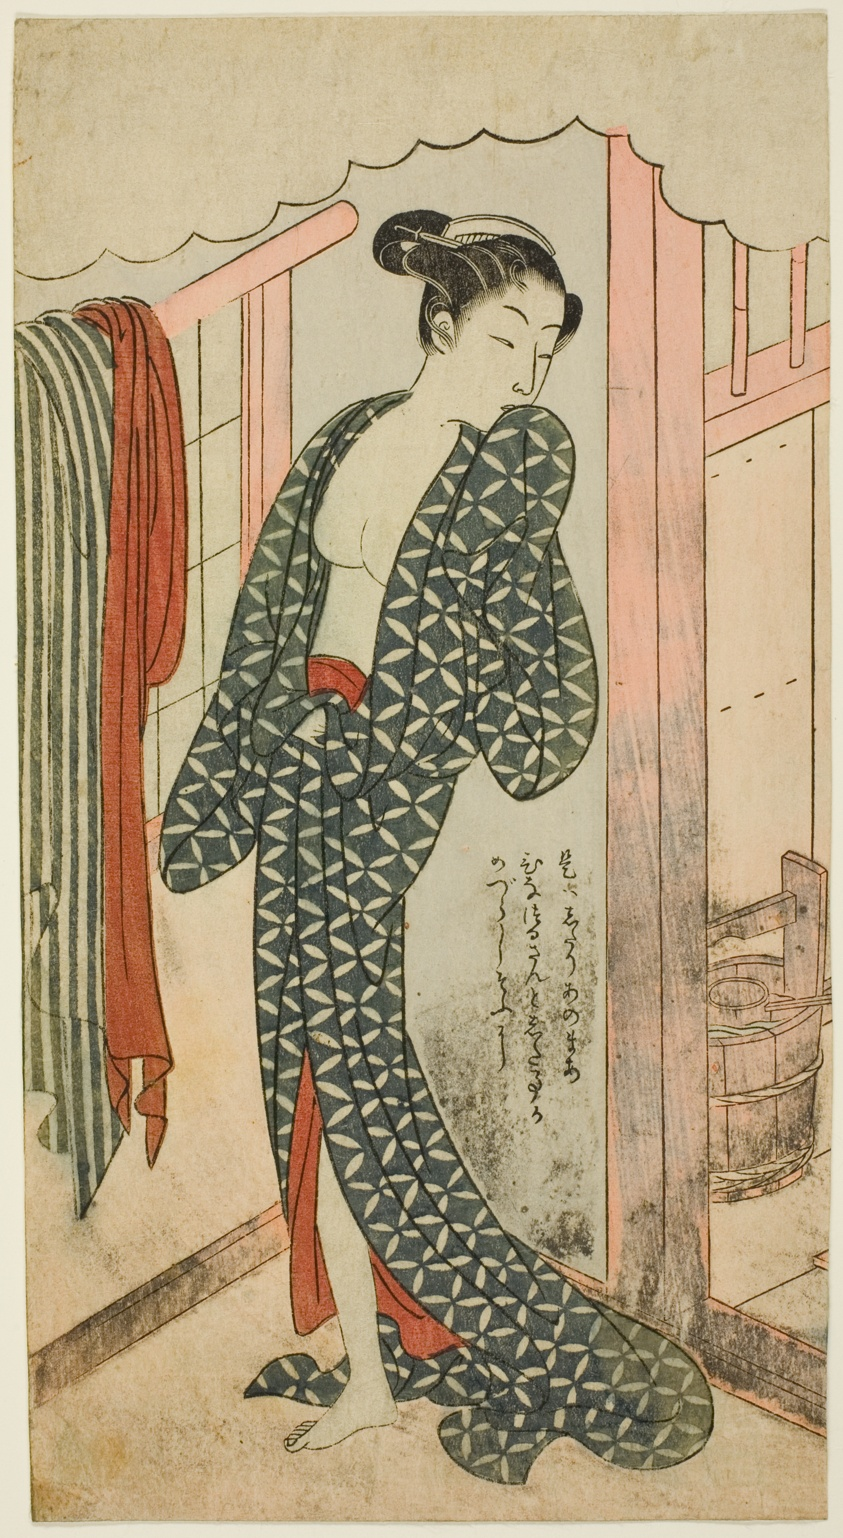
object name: Print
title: Woman in a Bathhouse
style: Japanese (culture or style)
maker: Suzuki Harunobu 鈴木 春信; Japanese, 1725 (?)-1770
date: c. 1769/70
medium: Color woodblock print; cut from chuban sheet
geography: Japan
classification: woodblock print; print; asian art